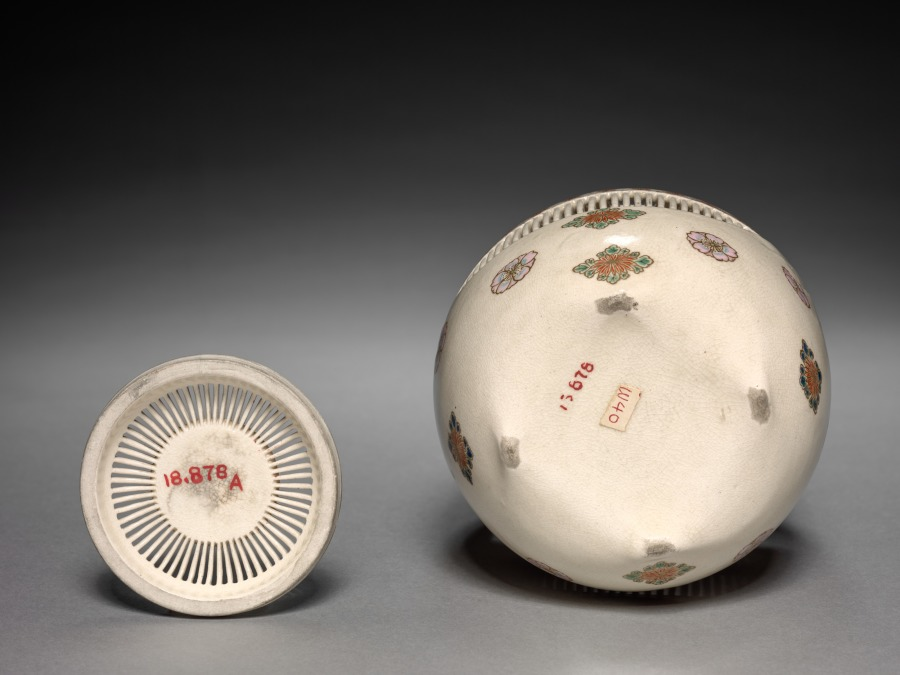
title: Jar: Satsuma Ware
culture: Japan, Edo period (1615–1868)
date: early to mid-1800s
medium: pottery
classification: Ceramic